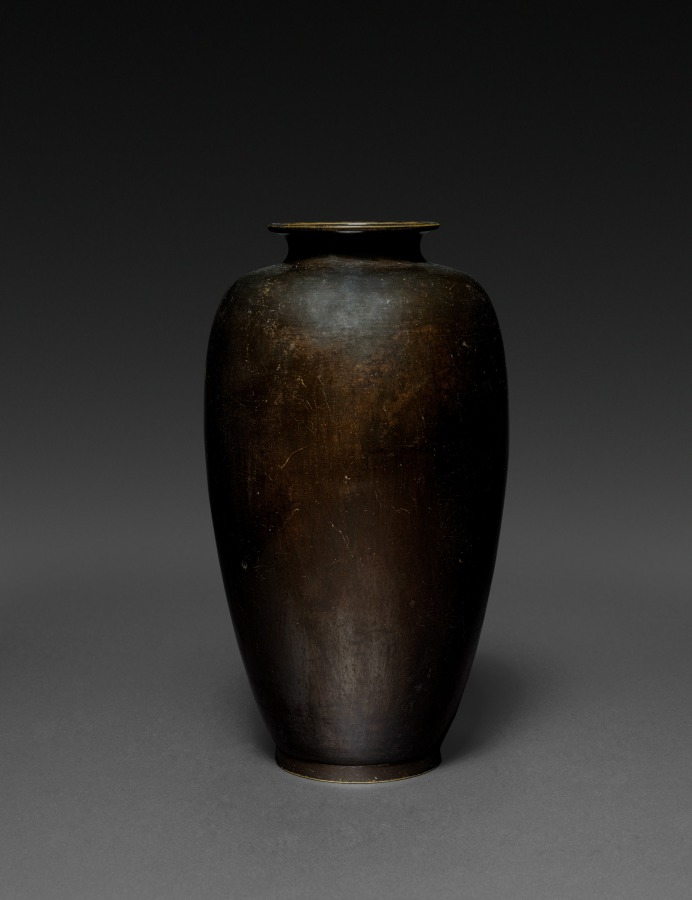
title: Bas relief Vase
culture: Japan, Meiji period (1868–1912)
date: c 1880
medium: bronze, gilding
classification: Metalwork